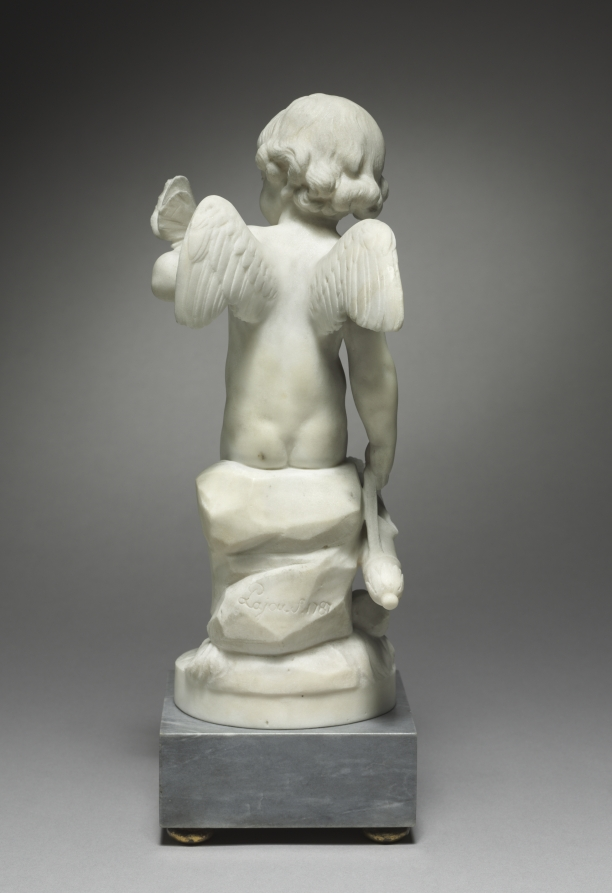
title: Fickle Love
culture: France, 19th century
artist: after Augustin Pajou (French, 1730–1809)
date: 1800s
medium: marble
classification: Sculpture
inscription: Signed Pajou f (fecit) 1787